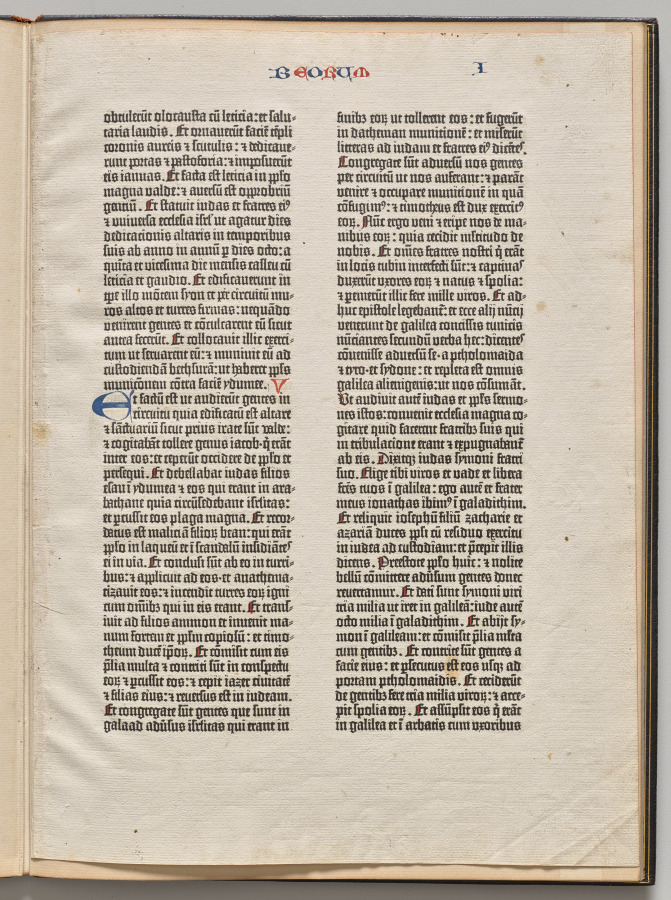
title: Page from a Gutenberg Bible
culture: Germany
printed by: Johann Gutenberg (German, c. 1397–1468)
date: c. 1450–1455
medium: printed page with hand-applied initials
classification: Bound Volume